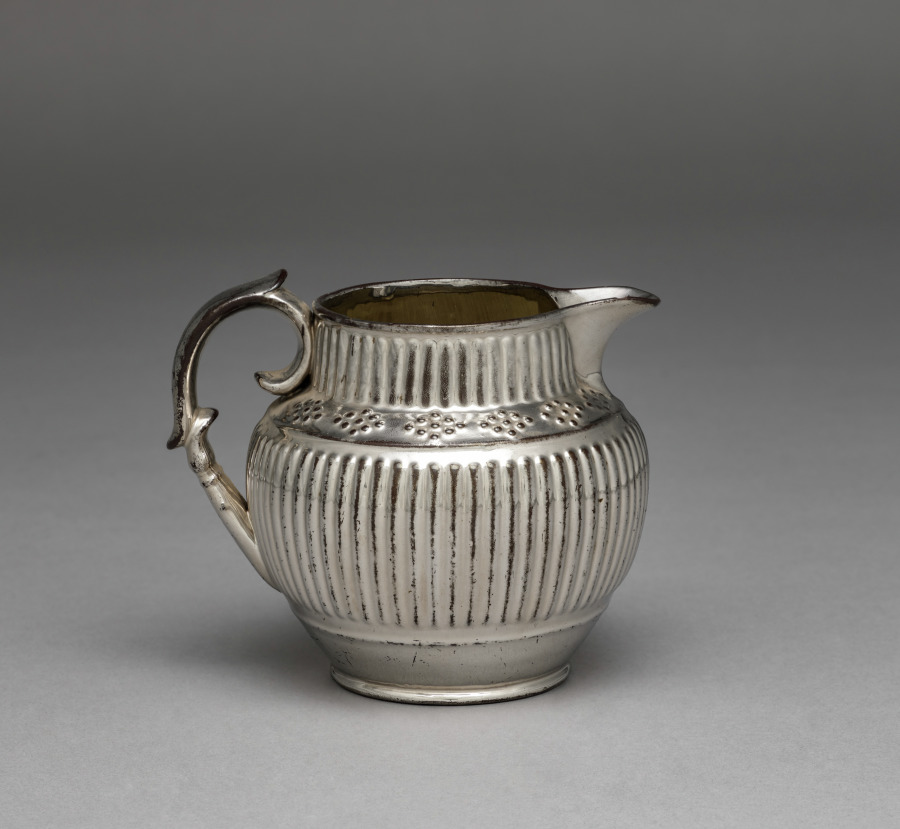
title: Jug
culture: England, Staffordshire, 19th century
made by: Staffordshire Factory (British)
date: 1800s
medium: lustreware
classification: Ceramic